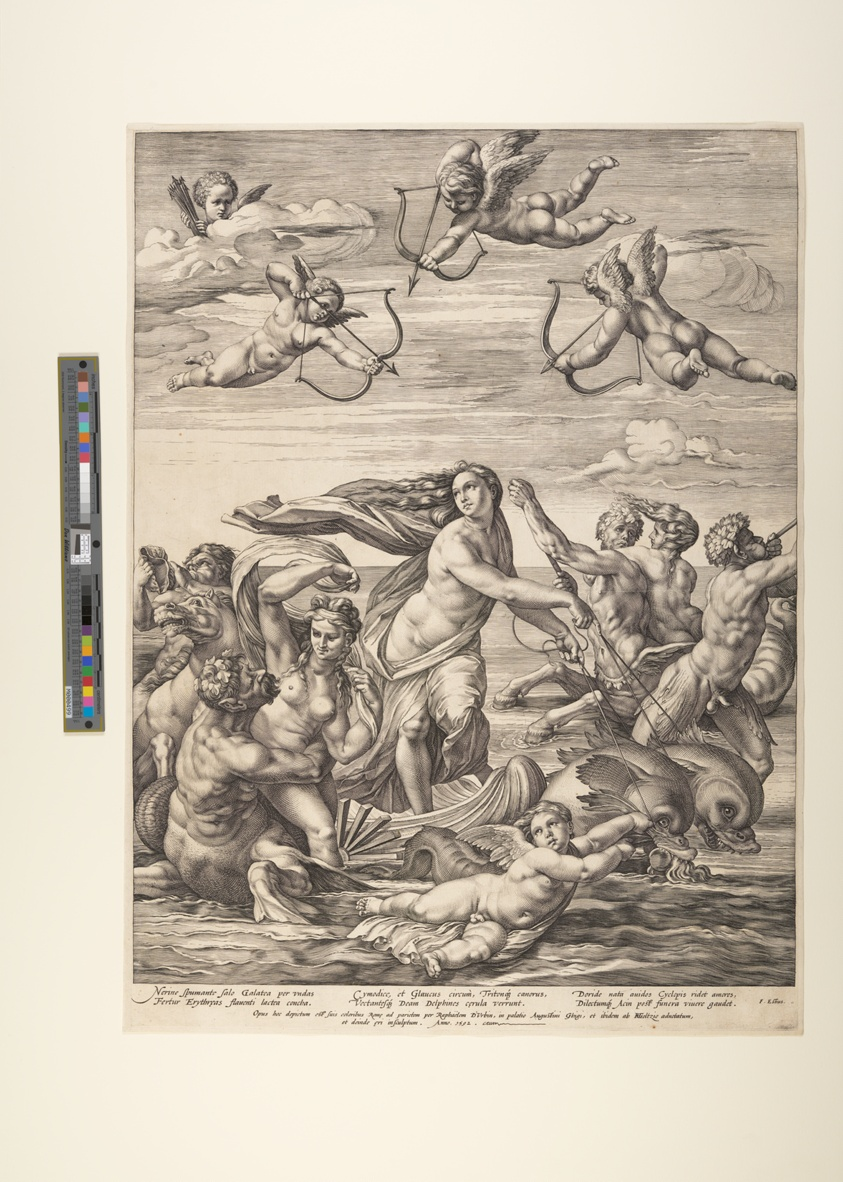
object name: Print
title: The Triumph of Galatea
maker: Hendrick Goltzius (Dutch, 1558–1617); after Raphael (Italian, 1483–1520)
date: 1592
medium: Engraving on ivory laid paper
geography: Netherlands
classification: engraving; paper; print; prints and drawing